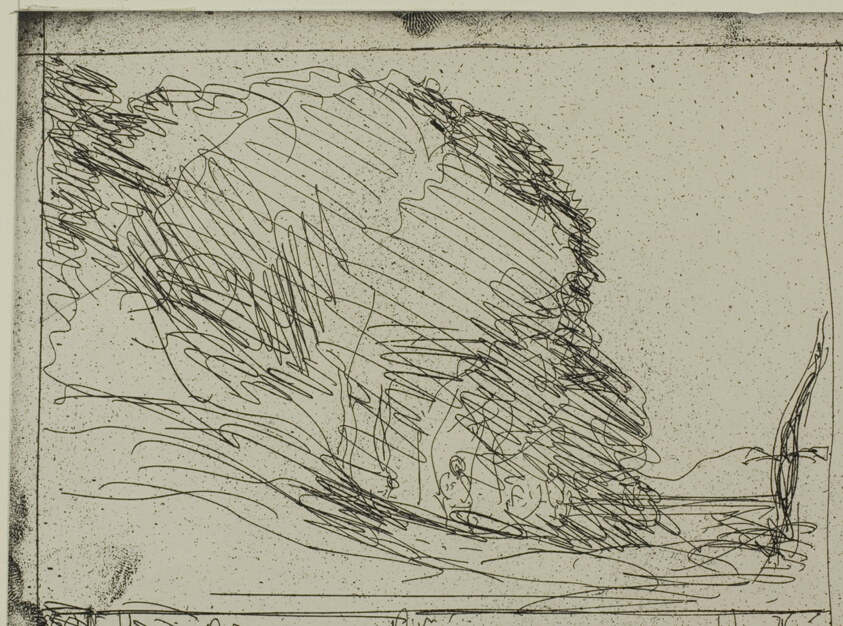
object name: Print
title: The Painters' Walk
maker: Jean-Baptiste-Camille Corot; French, 1796-1875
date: 1856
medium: Cliché-verre on ivory photographic paper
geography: France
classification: cliché-verre; print; prints and drawing